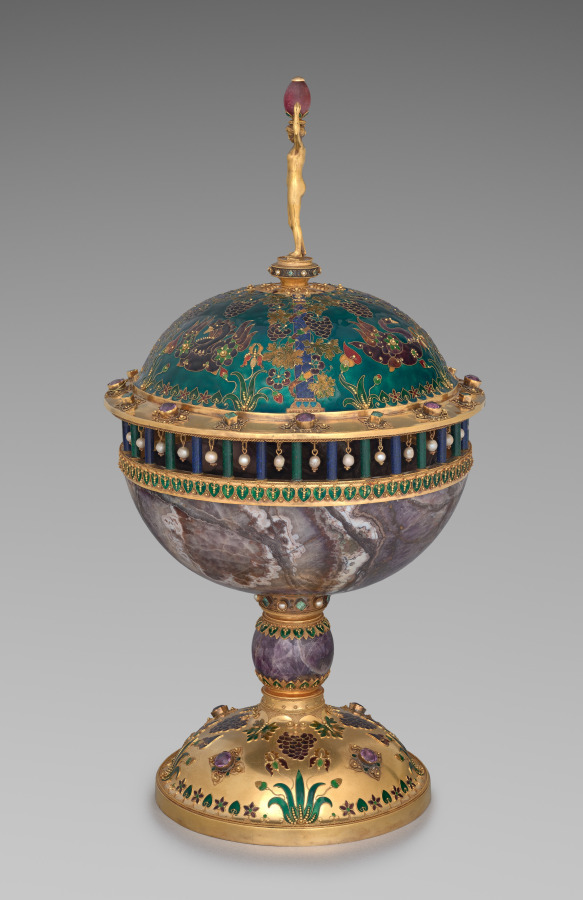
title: Covered Cup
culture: France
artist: Armand Point (French, 1861–1932)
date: c. 1897–99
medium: gilt copper alloy, enamel, amethysts, emeralds, ruby, pearls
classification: Metalwork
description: Armand Point started his career as a painter, but in the late 1800s, he became increasingly interested in decorative arts. In 1896, he established the Atelier de Haute-Claire in Marlotte, a colony of artists who handmade works of art to a very high standard. This cup was made there and is particularly ornate, showcasing different materials such as metal, enamels, gemstones, and pearls, as well as goldsmithing techniques.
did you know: The cup was originally acquired by Émile Nail-Démellette, Point's old high-school friend and later his benefactor.